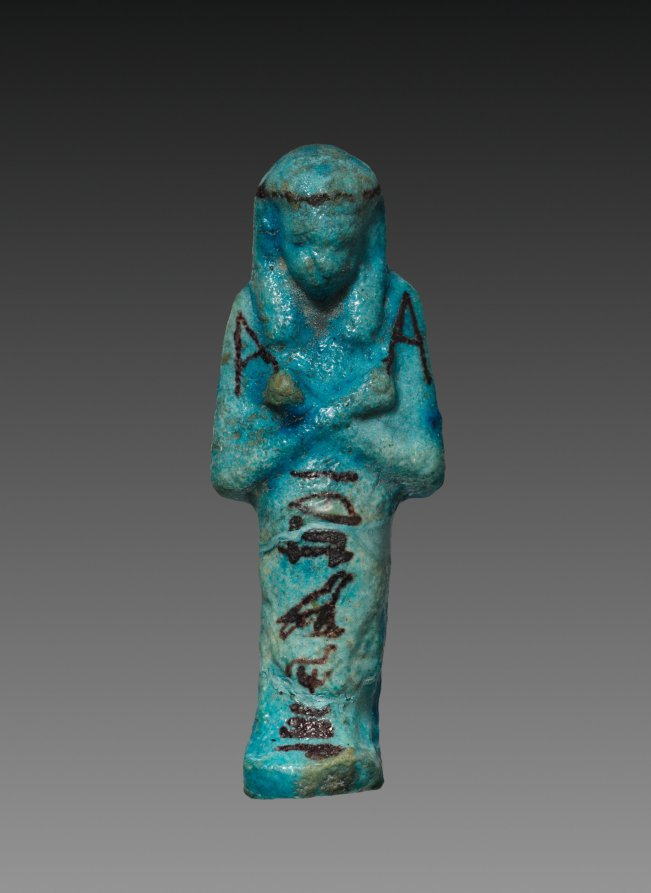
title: Shawabty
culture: Egypt, Third Intermediate (1069–715 BCE), Dynasty 21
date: c. 1000–945 BCE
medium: turquoise faience with black painted decoration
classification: Funerary Equipment